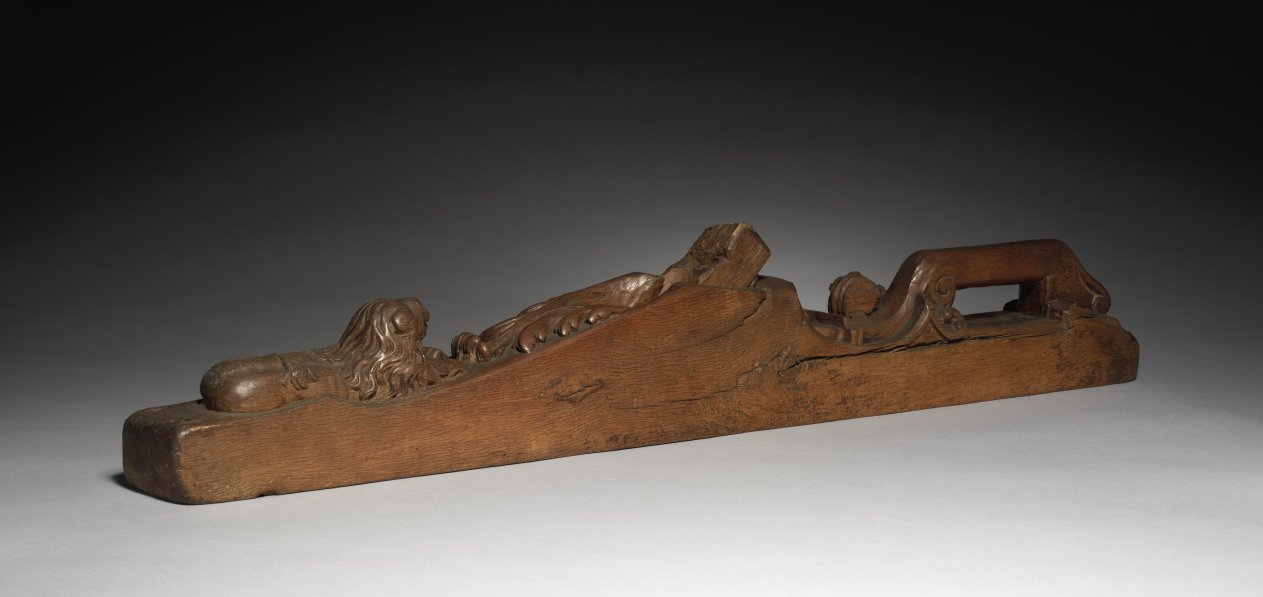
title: Plane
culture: Spain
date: 1600s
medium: oak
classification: Tool